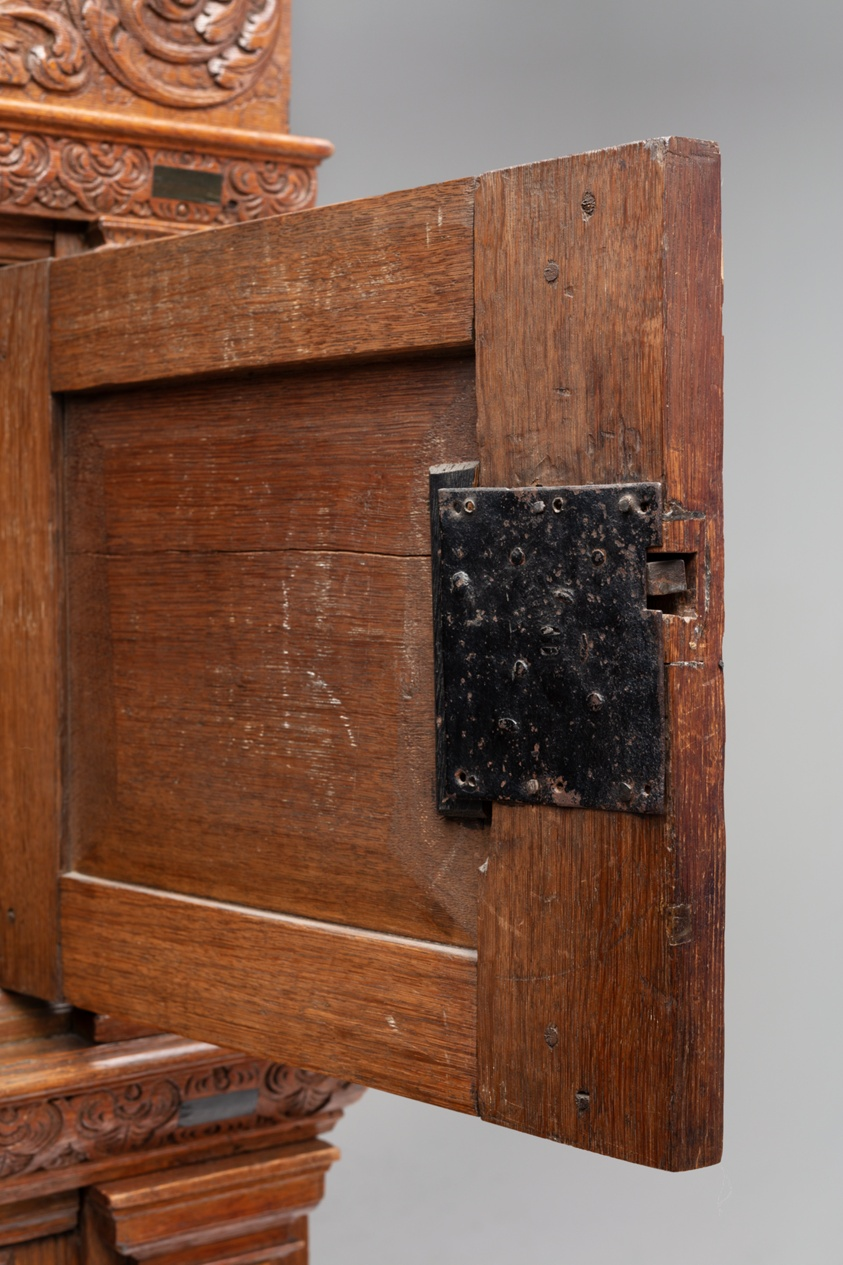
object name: Furniture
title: Linen Cupboard (Kast)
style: Baroque, Mannerism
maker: The Netherlands, probably Amsterdam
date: 1630/50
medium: Oak, pearwood, hardwood, paint, iron, and brass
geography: Netherlands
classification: furniture; decorative arts; functional object; furnishings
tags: lions, animals, architecture